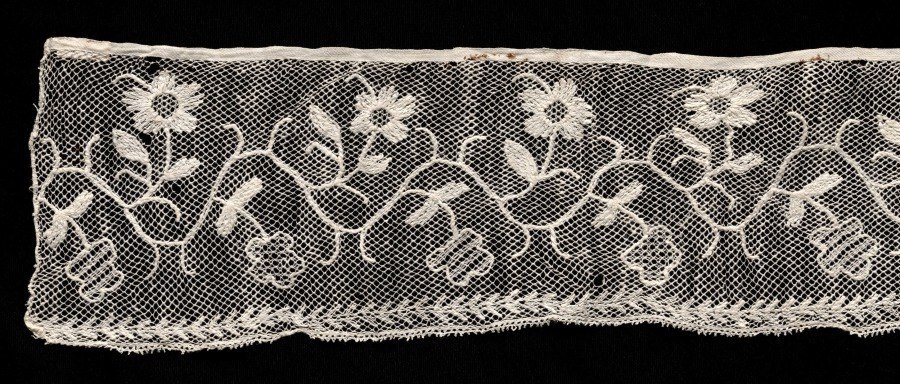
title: Band with Floral Vine Pattern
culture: Spain, c. 1850-70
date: c. 1850–70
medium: Bleached linen (est.): needle lace, filet/lacis (knotted ground and darned in one direction)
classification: Lace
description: This piece of lace is simple and honest in its decorative quality. The focus is on the floral vine, which stands out with its thick darning against the unadorned diamond ground netting.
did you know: The word lace derives from the Latin laqueus, meaning noose.